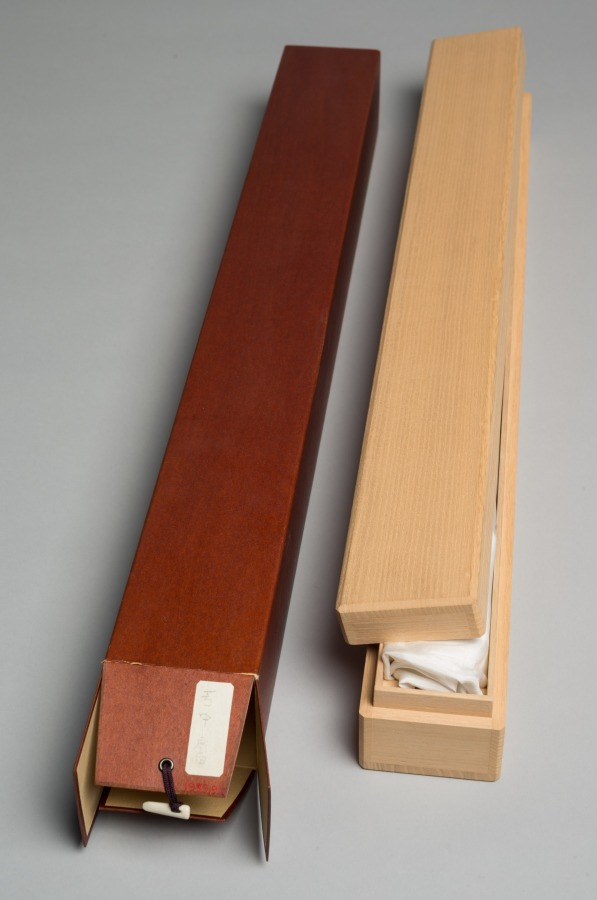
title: Waves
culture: Japan, Edo period (1615–1868)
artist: Nakamura Hōchū (Japanese, d. 1819)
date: late 1700s-early 1800s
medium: fan painting mounted as a hanging scroll; ink and color with gold on paper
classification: Painting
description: Nakamura Hōchū painted waves on this handheld fan to bring coolness to the mind of its bearer. While fragile paper fans are often used for a single season, this one was cherished for its design. Someone carefully removed it from its folding apparatus and converted it into a hanging scroll for occasional enjoyment in an alcove.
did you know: Nakamura Hōchū took inspiration for his work from the painter Ogata Kōrin.